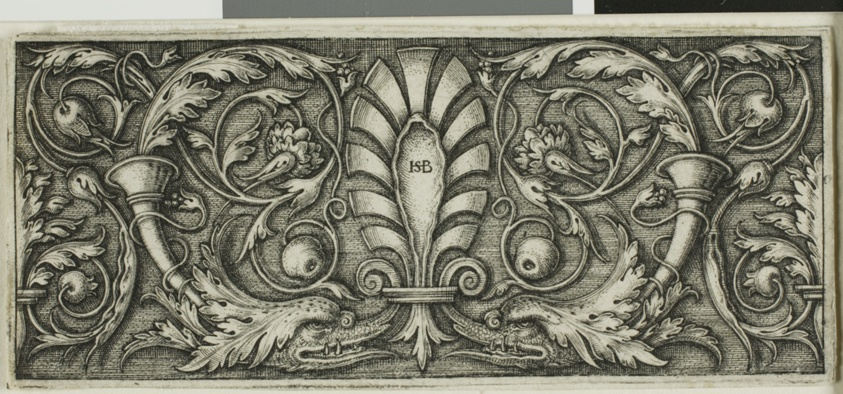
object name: Print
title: Ornament with a Palmette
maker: Sebald Beham; German, 1500-1550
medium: Engraving in black on ivory laid paper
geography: Germany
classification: engraving; print; prints and drawing